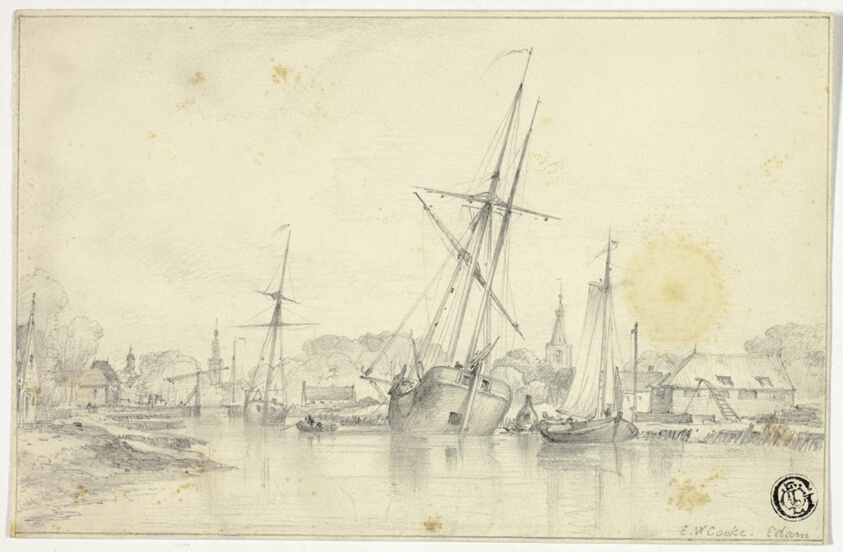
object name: Drawing and Watercolor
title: Edam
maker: Edward William Cooke (English, 1811-1880)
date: c. 1850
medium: Graphite on ivory wove paper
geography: England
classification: graphite; drawings (visual works); prints and drawing